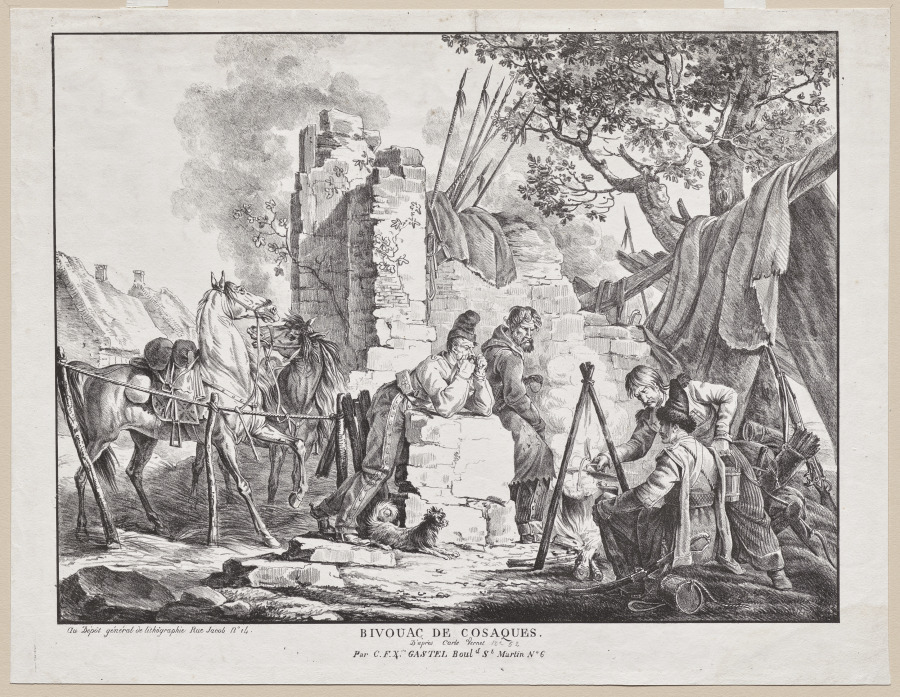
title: Bivouac de Cosaques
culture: France, 18th-19th century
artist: Carle Vernet (French, 1758–1836)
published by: C.F.X. Gastel, Bould. St. Martin No. 6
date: c. 1800–1836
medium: lithograph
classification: Print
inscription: in plate, lower right, below image: "Au Depot generale de lithographie Rue Jacob N°14."; In plate, below image, center: "Bivouac de Cosaques. D'Apres Carle Vernet 17°-52 Par C.F.X. GASTEL Bould St Martin N°6"